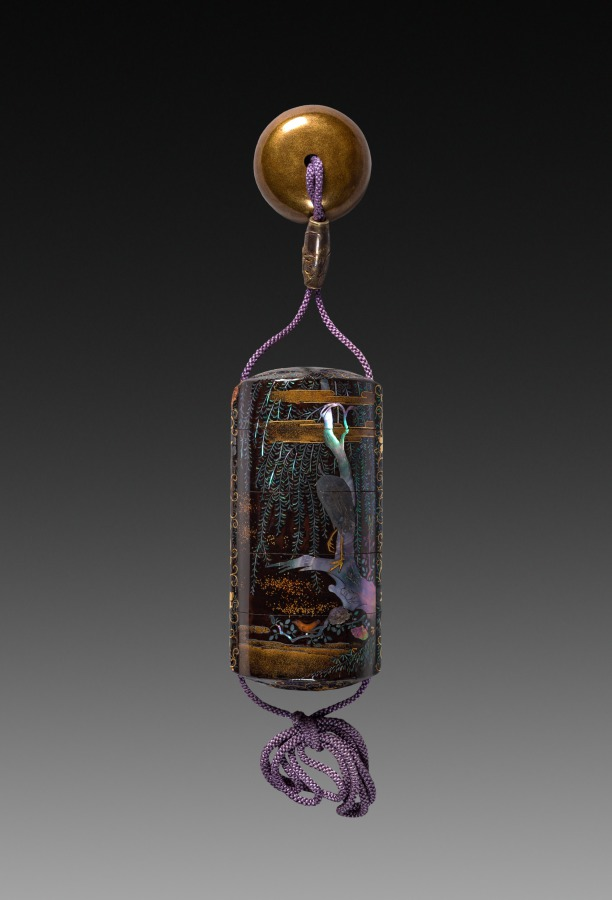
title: Inro (Case) with Egrets and Willows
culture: Japan, Edo period (1615–1868)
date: 1700s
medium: Lacquer on wood with sprinkled gold powder design (maki-e) and gold-foil-and-shell inlay (Somada style)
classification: Lacquer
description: The iridescence of this inro is due to the shell inlay used to form the design of an egret (a waterfowl) standing among reeds in water beneath a weeping willow on one side and an egret resting in a tree on the other. The metal ojime (cinch) has a floral design, and the round lacquer netsuke, or toggle, has an image of a Chinese gentleman, possibly an immortal, holding flowers planted in a shallow pot.